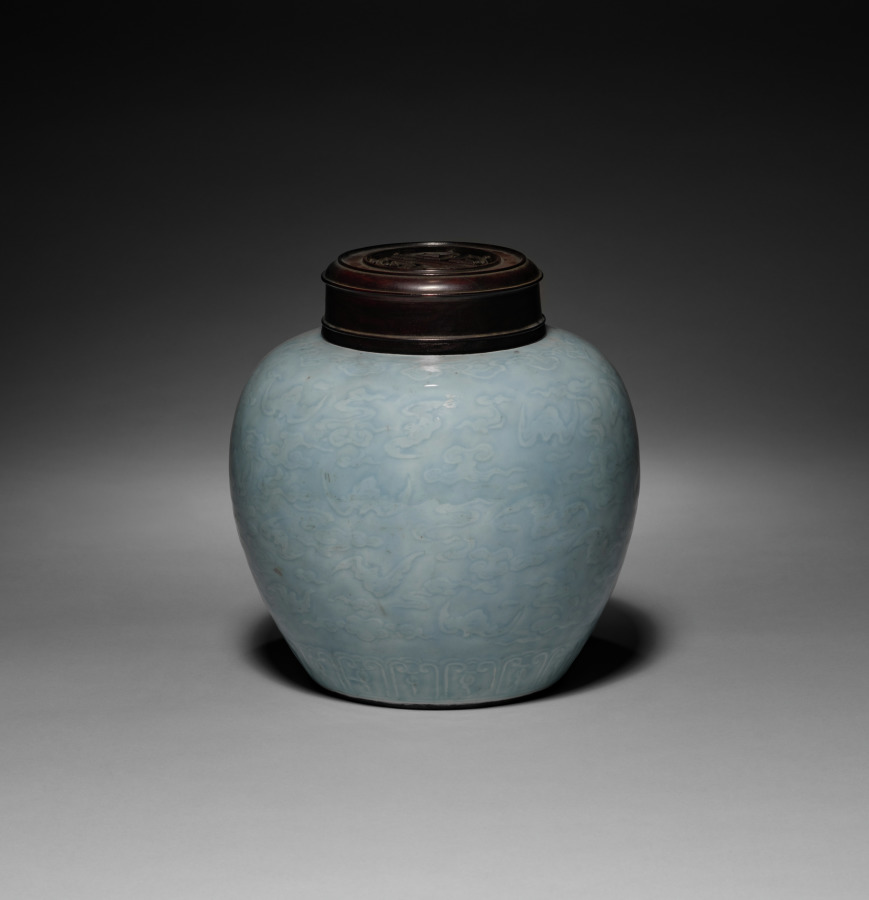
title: Jar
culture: China, Qing dynasty (1644–1911), Qianlong reign (1736–95)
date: 1736–95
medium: porcelain with molded decoration and blue glaze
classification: Ceramic